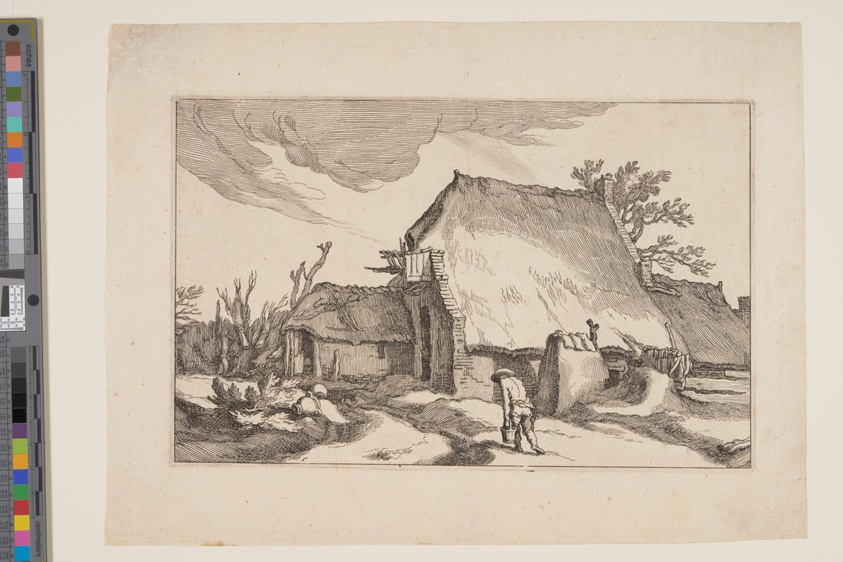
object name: Print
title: Plate 5, from Landscapes with Farmhouses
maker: Boëtius Adamsz. Bolswert (Flemish, 1580–1633); after Abraham Bloemaert (Dutch, 1566–1651)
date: 1614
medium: Etching on ivory laid paper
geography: Flanders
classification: print; paper; prints and drawing; etching